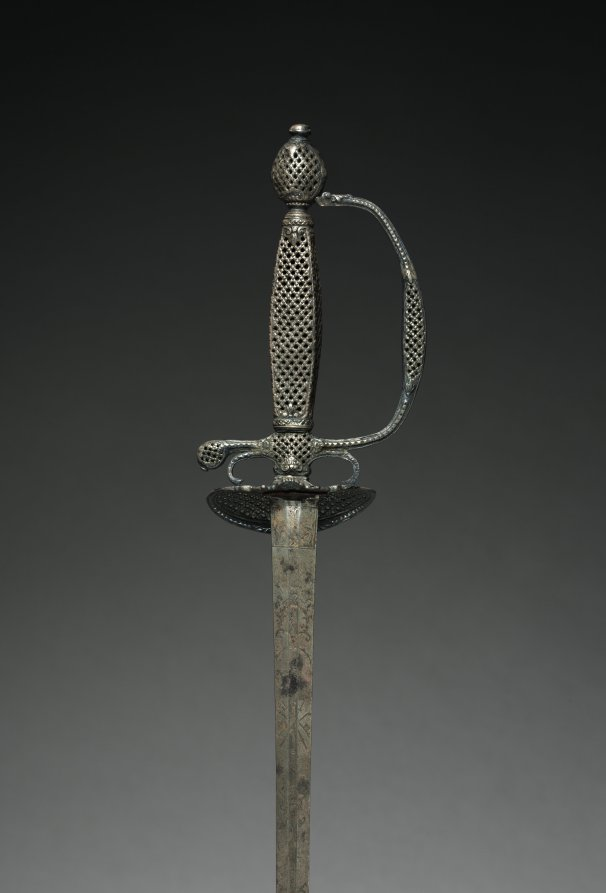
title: Child's Sword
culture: France, Paris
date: c 1780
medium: stainless steel, silver and brass wire inlay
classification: Arms and Armor